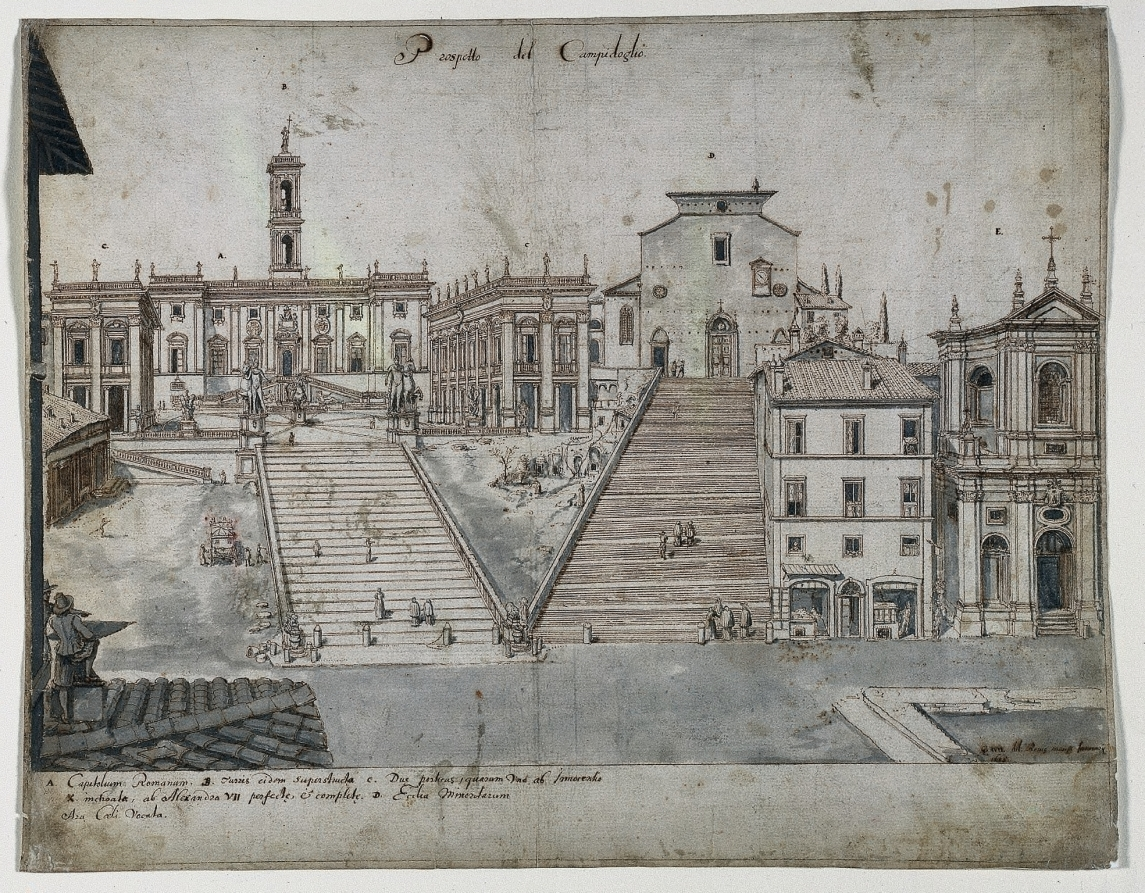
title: Eighteen Views of Rome: The Campidoglio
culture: Flanders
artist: Lievin Cruyl (Flemish, c. 1640-c. 1720)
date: 1665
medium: pen and brown ink and brush and gray wash over graphite; framing lines in brown ink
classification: Drawing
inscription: signed, lower right, in brown ink: [artist's monogram: LC] RVYL del: Romæ mense Januarij / 1665. ; by artist, upper center, in brown ink: Prospetto del Campidoglio ; by artist, throughout composition, in brown ink: [the letters A-E] ; by artist, lower left, in brown ink: A. Capitolium Romanum. B. Turris eidem superstructa. C. Due Porticus, quarum Una ab Innocentio / X. inchoatæ, ab Alexandro VII perfectæ et completæ. D. Ecclia Minoritarum / Ara Coeli Vocata. ; VERSO, upper left, in brown ink: S45.[partially masked] ; upper left in graphite: n. 545 ; ON STRIPS OF PAPER MOUNTED TO VERSO, lower center, in graphite: A20970 ; lower right, in graphite: E. 10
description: Flemish artist Lieven Cruyl made a number of drawings of emblematic vistas of Rome for the Roman publisher Giovanni Battista de Rossi, of which ten were published as etchings in 1666. The Campidoglio features architecture designed by Michelangelo. The Campidoglio was an important ritual space atop the Capitoline Hill overlooking the Roman Forum. Michelangelo reoriented the piazza to look away from the forum and toward Saint Peter’s Basilica, creating a link between the civic buildings on the piazza and the home of the Catholic Church. He had the piazza paved in a trapezoidal shape and placed the ancient Equestrian Statue of Marcus Aurelius on a newly designed plinth in the middle. With this design, he transformed the Campidoglio from a muddy hill to a central destination and ritual space for centuries to come.